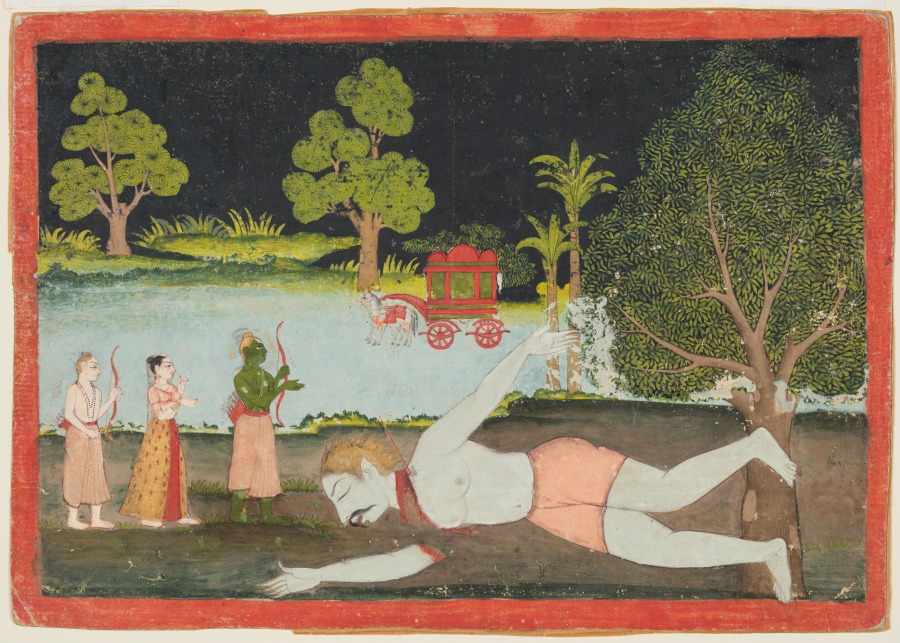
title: Rama and Lakshmana slay the demon giant Viradha, from Chapters 2 through 4 of the Aranya Kanda (Book of the Forest) of a Ramayana (Rama’s Journey)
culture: Central India, Bundelkhand Region, Madhya Pradesh, Rajput Kingdom of Datia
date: c. 1770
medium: gum tempera and gold on paper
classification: Painting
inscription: [[verso, at lower right, sideways]] 20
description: Viradha was once a celestial musician named Tumburu, who was cursed by Kubera, guardian king and god of wealth, to turn into a demon until he was killed by Rama. During their exile, when the hero Rama, his brother Lakshmana, and wife Sita were venturing in the Dandaka Forest, the demon appeared in front of the divine party and abducted Sita. Rama and Lakshmana slayed the demon and rescued Sita, and Viradha was freed from his curse.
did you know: Rama is depicted with a green complexion in central and southern India.